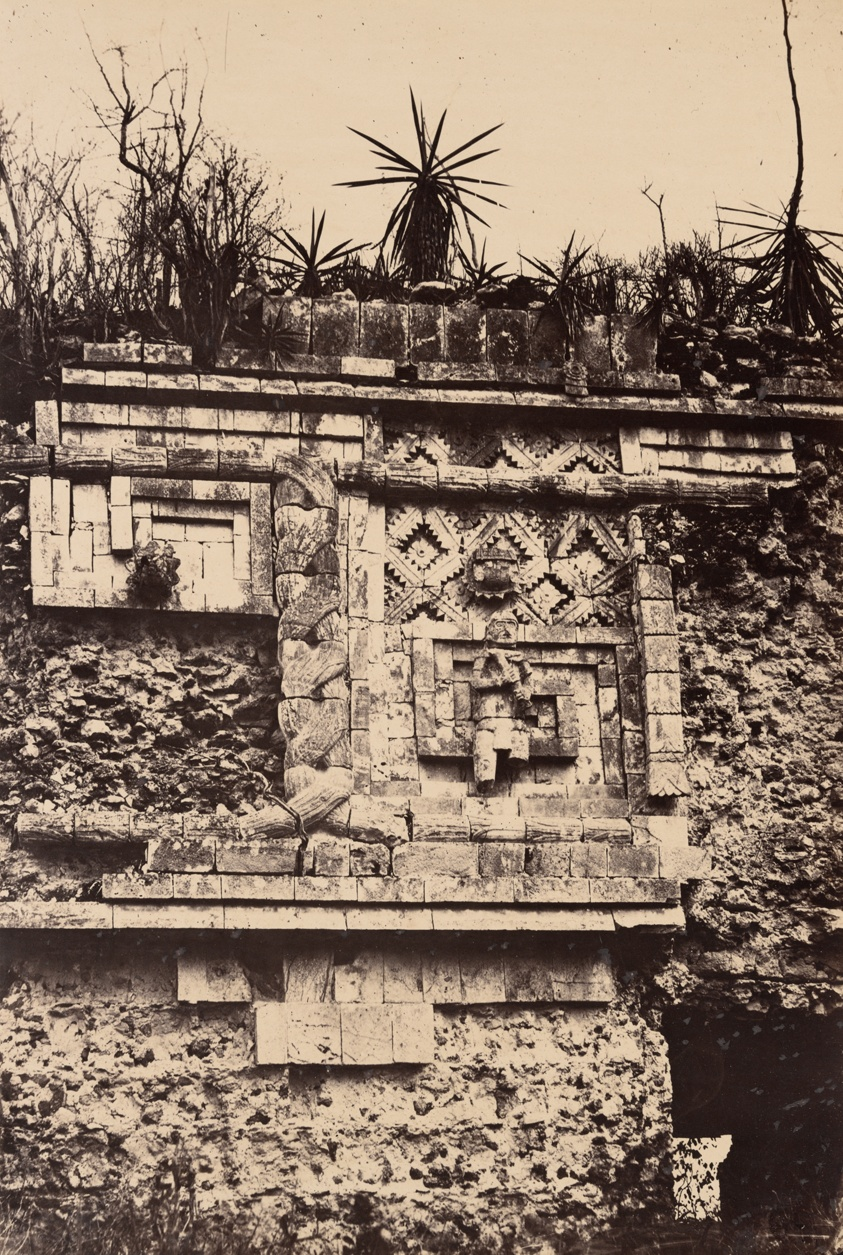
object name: Photograph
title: Uxmal, Indian Bas Relief, Nun's Palace (Uxmal, Bas Relief de l'Indien, Palais des Nonnes), plate 44 from the album "Cités et Ruines Américaines, Gide Paris" (1863)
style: 19th century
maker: Désiré Charnay; French, 1828-1915; Not printed by the artist.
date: 1860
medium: Albumen print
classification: photograph; albumen silver print; photography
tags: Paris